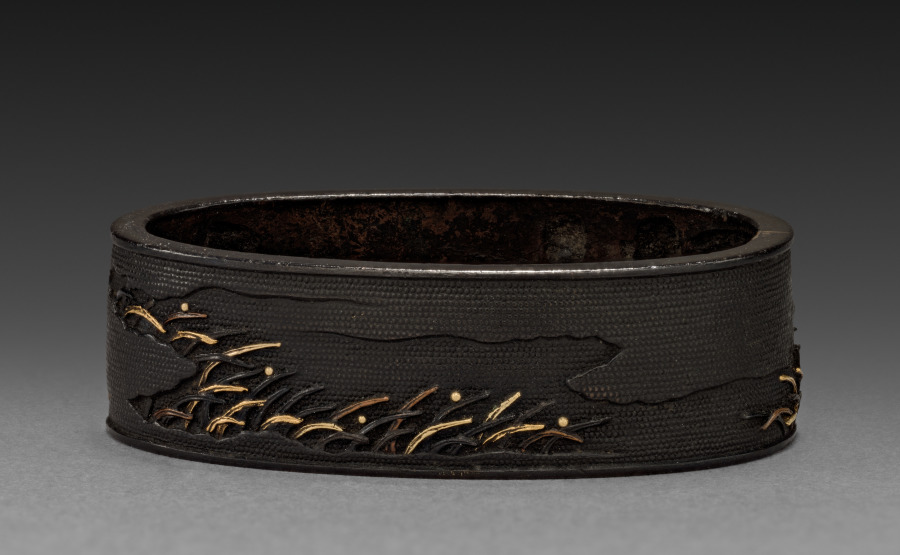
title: Sword-Hilt Collar (Fuchi)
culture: Japan, Edo period (1615–1868)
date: 1700–1850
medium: shakudo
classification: Arms and Armor